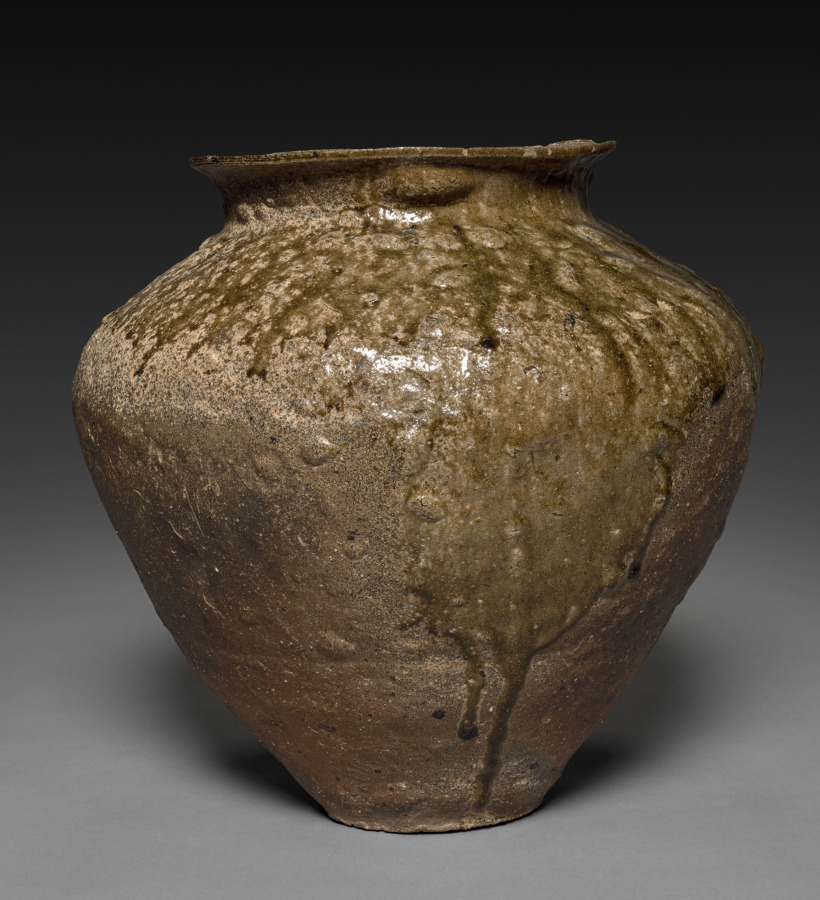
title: Storage Jar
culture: Japan, Kamakura period (1185–1333)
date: late 1100s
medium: Stoneware with natural ash glaze (Tokoname ware)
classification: Ceramic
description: Tokoname, located on Ise Bay in present-day Aichi prefecture on Japan’s main island, Honshu, was the largest center of ceramic production in medieval Japan. It had been an active center of ceramic production since the Heian period (794–1185). Wide-mouthed jars like this one are called kame, and were favored for use in tea practice.